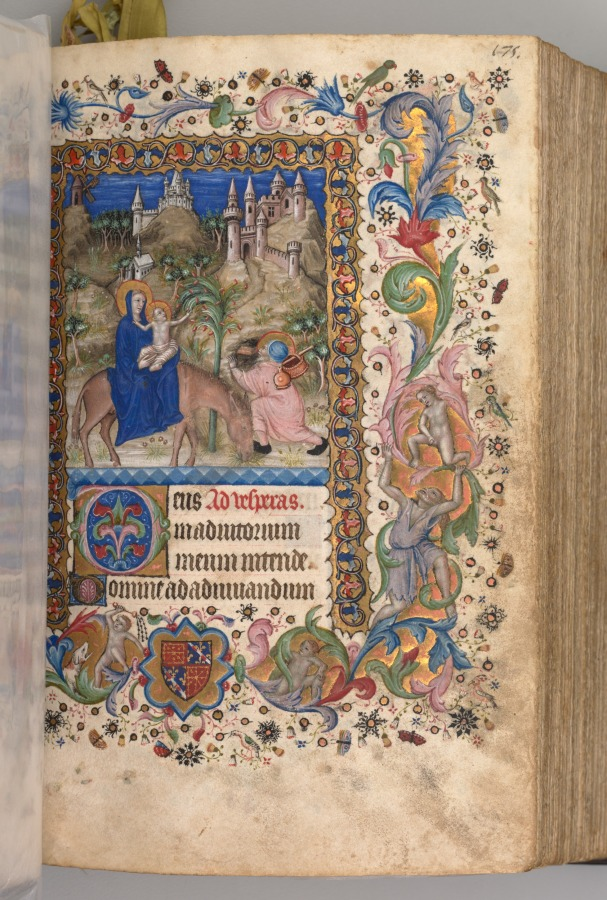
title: Hours of Charles the Noble, King of Navarre (1361-1425): fol. 88r, Flight into Egypt (Vespers)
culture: France, Paris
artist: Master of the Brussels Initials and Associates (French)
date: c. 1405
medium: ink, tempera, and gold on vellum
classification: Bound Volume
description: This precious volume was obviously highly prized by its owner, the French-born King of Navarre, who had his coat of arms painted on no less than twenty folios. Rather than directly commissioning this manuscript from a specific workshop, it seems that Charles the Noble acquired his book of hours -- perhaps ready-made for the luxury market -- while on a trip to Paris in 1404-05. A collaborative effort, six painting styles are evidenced within the pages of this codex, those of two Italians, two Frenchmen, and two Netherlanders. The painter who was responsible for the planning and decoration of the book, and who produced seventeen of the large miniatures, was a Bolognese artist known as the Master of the Brussels Initials. His principal assistant, responsible for most of the borders, was a Florentine who signed his name "Zecho" da Firenze on folio 208 verso.